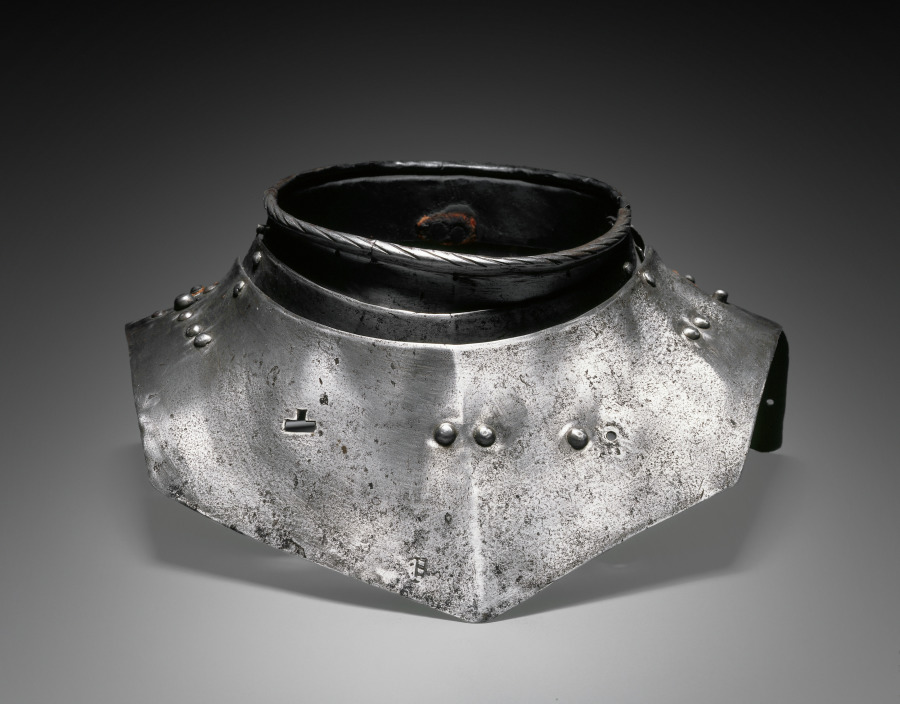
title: Gorget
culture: Germany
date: c. 1560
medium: steel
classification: Arms and Armor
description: A gorget is an element of armor that protects the neck, throat, and upper part of the chest. It normally consists of two parts, front and back, joined by a hinge on the left shoulder and fastened with a stud on the right. Gradually the gorget grew smaller and more symbolic becoming a symbol of rank. By the 1700s it became a single crescent shape worn on a chain that suspended the gorget even lower on the chest, so that it no longer protected the throat in normal wear.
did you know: This gorget has a guild mark from Nuremburg, which functioned as a seal of quality.